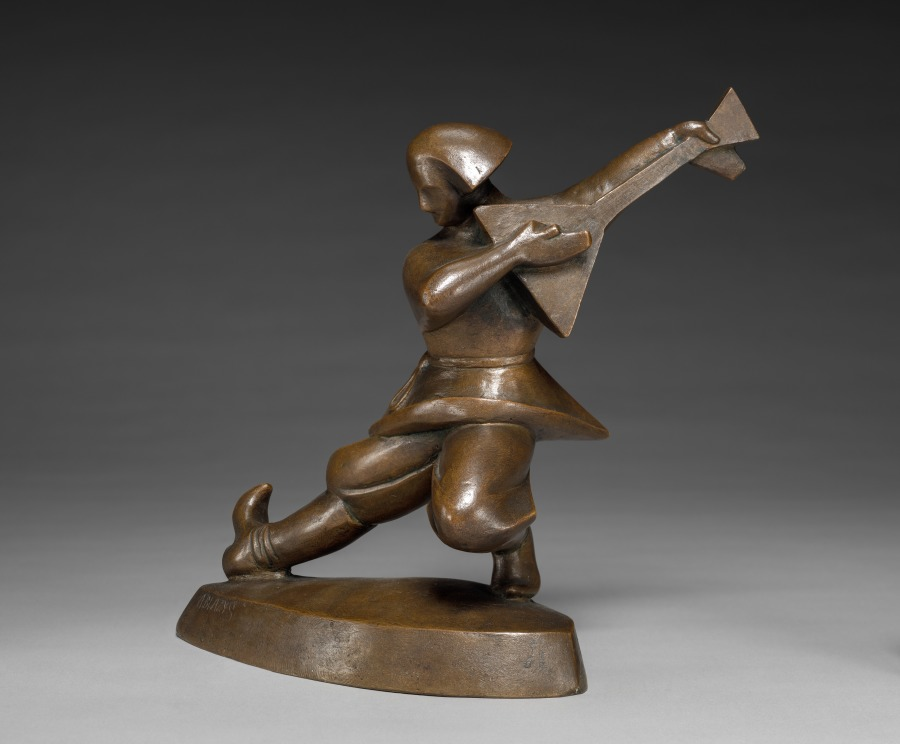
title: Balalaika Player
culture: America, Ohio, Cleveland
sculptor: Alexander Blazys (American, born Russian Empire [now Lithuania], 1894–1963)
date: 1925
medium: bronze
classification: Sculpture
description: A Lithuanian immigrant, Blazys introduced modernist sculpture to Cleveland upon his arrival in 1925. These figures merge rhythmic movement inspired by music with faceted, geometric planes derived from Cubism.